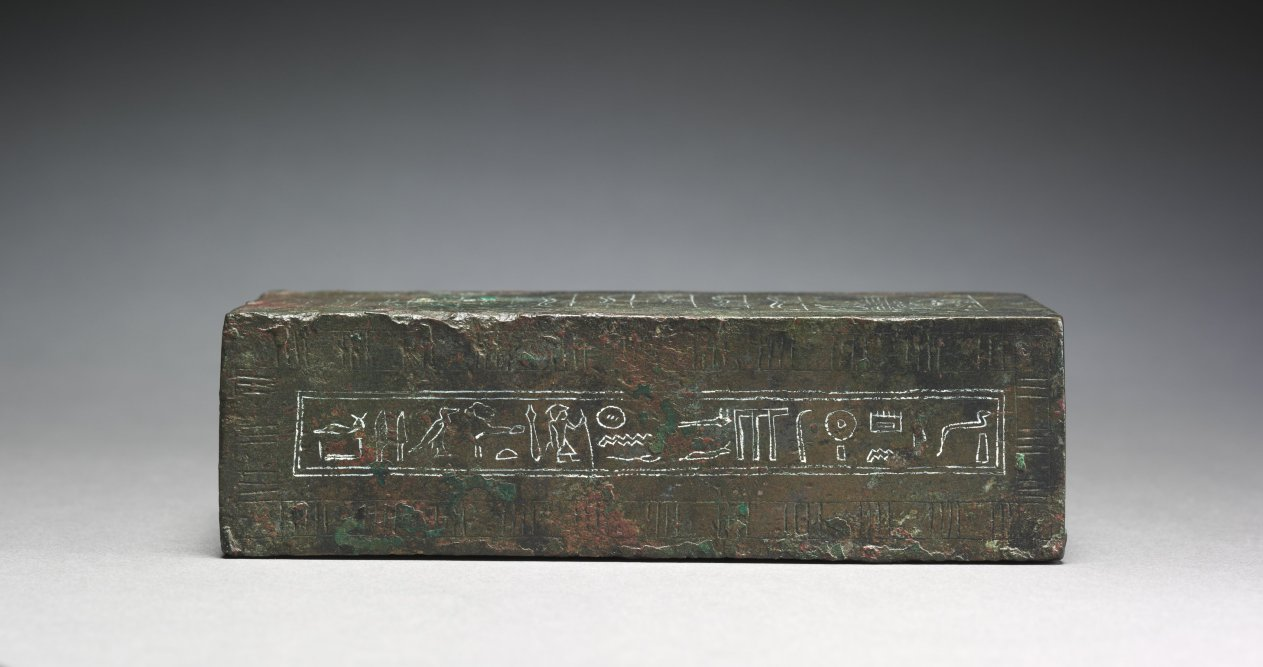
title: Statue Base Dedicated to Amen-Ra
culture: Egypt, Late period (715–332 BCE), Dynasty 26 or later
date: 664–525 BCE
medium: bronze, hollow cast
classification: Sculpture